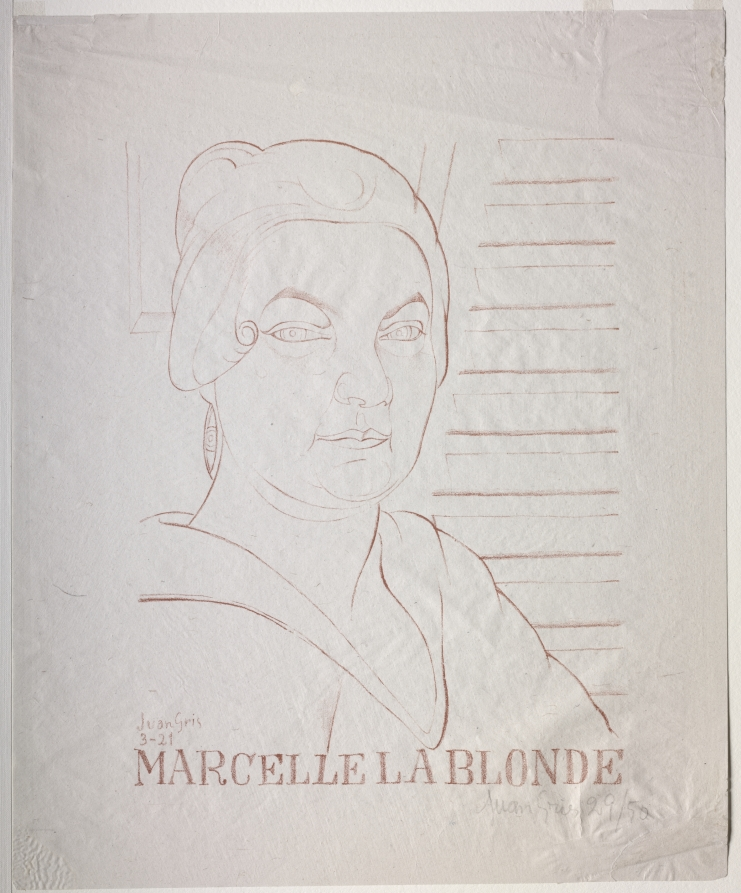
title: Marcelle la Blonde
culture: Spain, worked in France (Paris), 20th century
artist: Juan Gris (Spanish, 1887–1927)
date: 1921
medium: lithographprinted in red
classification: Print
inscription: Signed and numbered by the artist, in graphite: 29/0